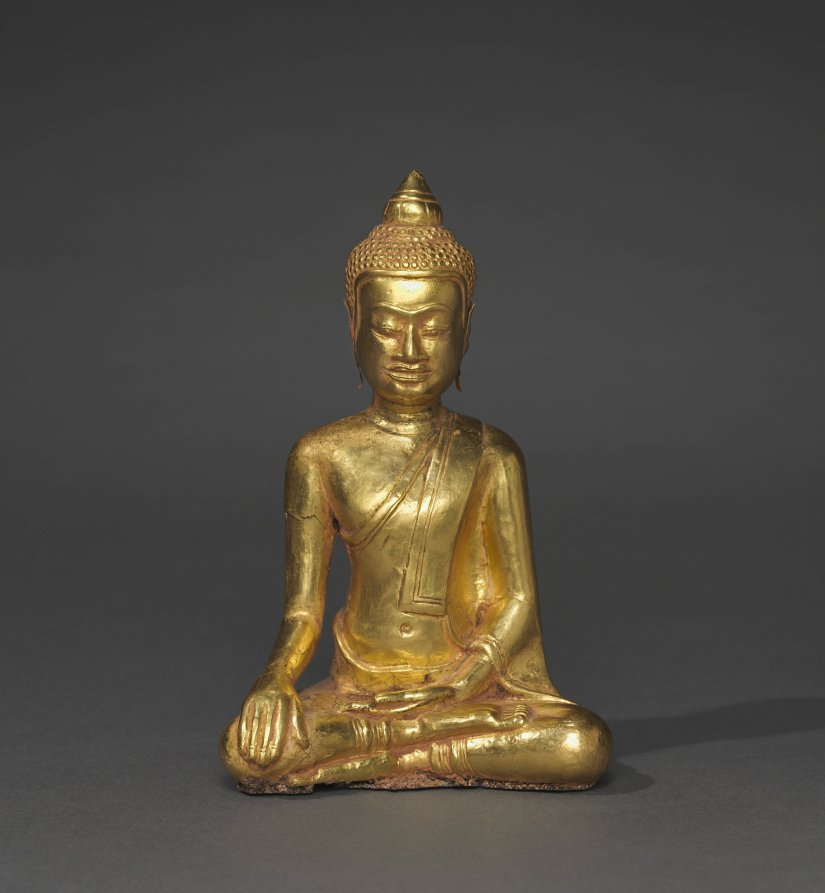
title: Seated Buddha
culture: Thailand, Ayutthaya, Wat Ratchaburana, 14th century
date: before 1424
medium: gold with resin core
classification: Sculpture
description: This pristinely modeled Buddha was fashioned from a sheet of 24-karat gold, using the repoussé (hammering) technique. The figure is filled inside with a resin core. The style is typical of the last phase of Khmer art (800s–1400s), the Lapburi style, which combines characteristics of both Cambodian and Thai sculptural styles.